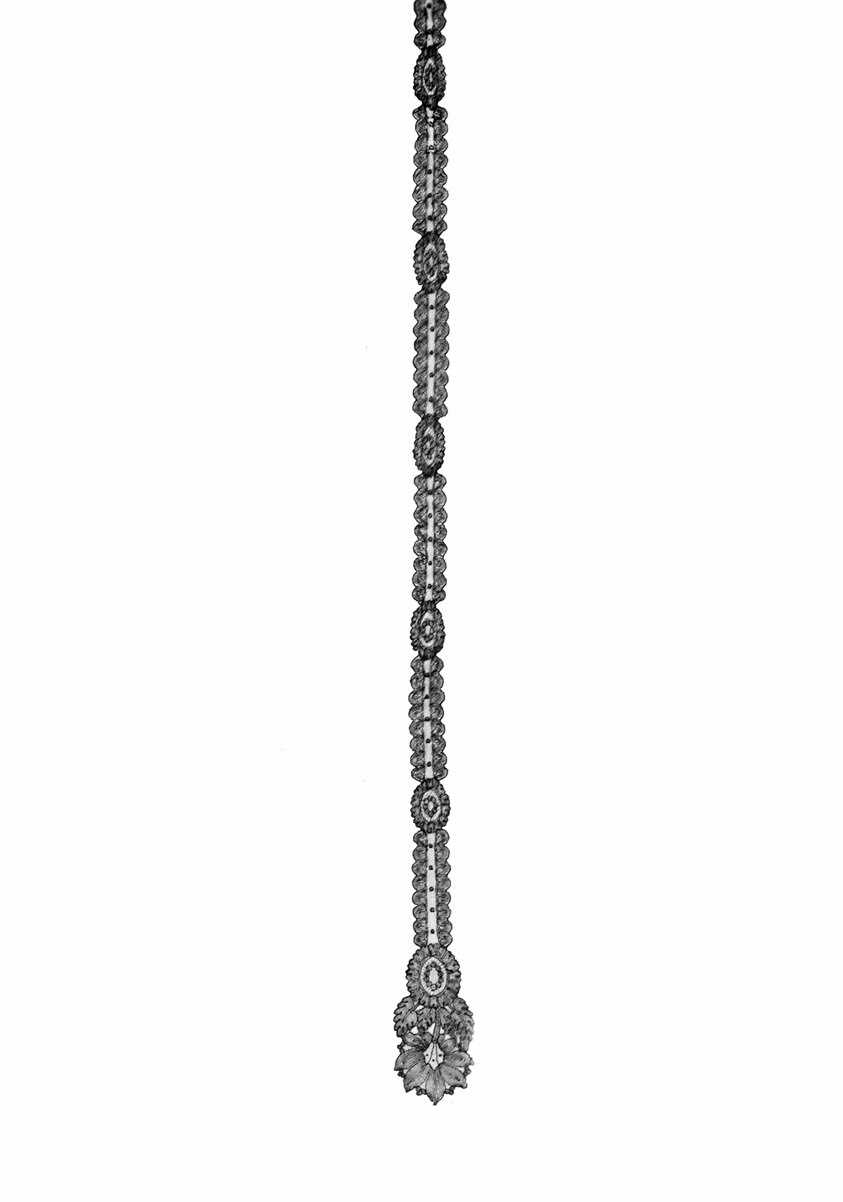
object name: Costume and Accessories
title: Pair of Lappets (Joined)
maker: France, probably Bayeux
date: 1850s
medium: Silk, bobbin straight lace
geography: France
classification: costume accessory; lace - bobbin; textile; costume; costume accessory - headdress; costume accessory worn above the waist